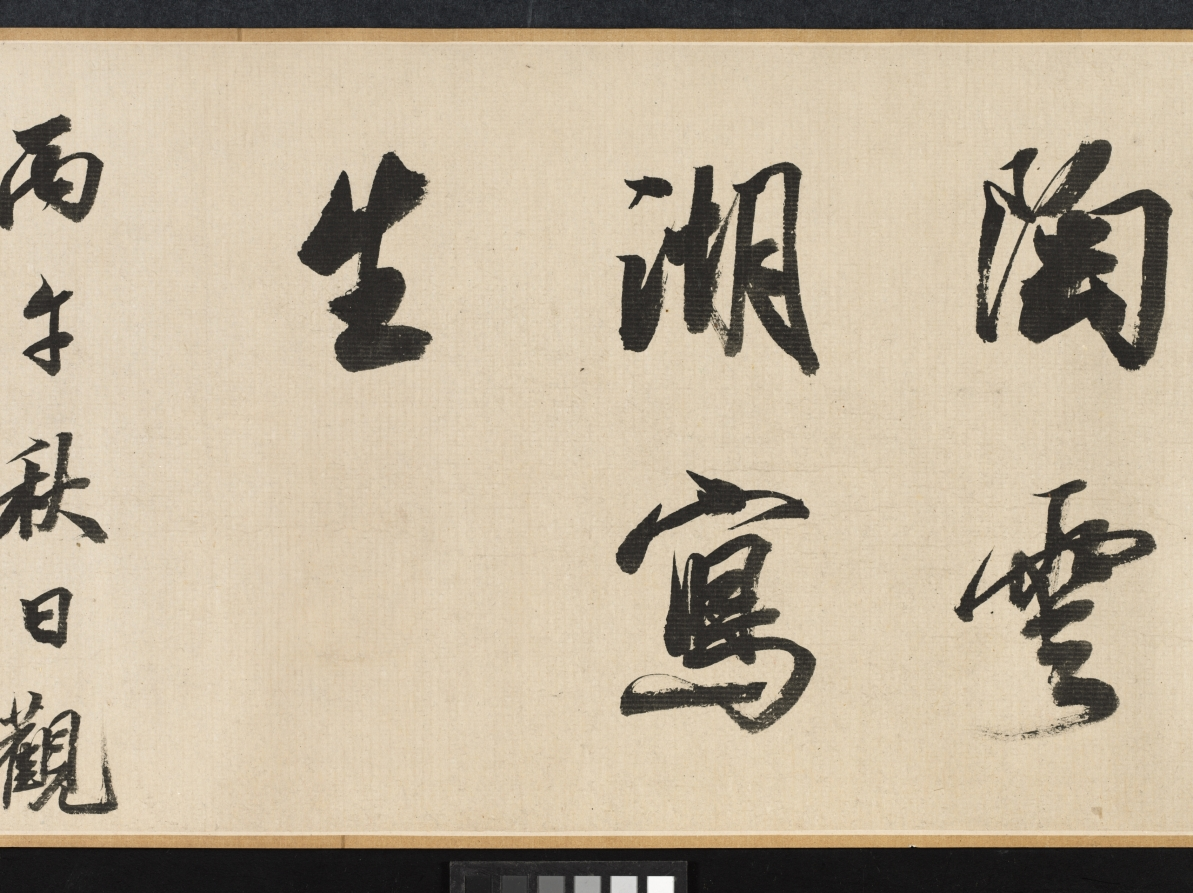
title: Chrysanthemums and Cabbage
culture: China, Ming dynasty (1368–1644)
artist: Tao Cheng (Chinese, active c. 1471–after 1502)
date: c. 1486 or before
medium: handscroll, ink and slight color on paper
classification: Painting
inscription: Artist's seal at beginning of painting: Yun hu 雲湖. Title by Wang Wenzhi 王文治 (1730–1802), date 1756. 2 seals of Wang Wenzhi 王文治 (1730-1802); 3 seals of Ku Yün (n. d.)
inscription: Section A (Chrysanthemums): 1 poem and 1 seal of Zhang Yuanzhen 張元禎 (1437–1507) - Jinshi, 1461; 1 poems and 3 seals of Ni Yue 倪岳 (1444–1501) - Jinshi, 1464; 1 poems and 2 seals of Zhao Xiang 趙祥 (life dates unknown) - Jinshi, 1469; 1 poems and 1 seals of Wu Xixian 吳希賢 (1437–1489) - Jinshi, 1464; 1 poems and 1 seals of Lü Chang 呂㦂 (1449–1511) - Juren, 1471; 1 poems and 3 seals of Fu Han 傅瀚 (1435–1502) - Jinshi, 1464; 1 poems and 1 seals of Feng Jue 馮珏 (life dates unknown) - Jinshi, 1478.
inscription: Chrysanthemums section, poem 1, by Zhang Yuanzhen 張元禎 (1437–1507): Several bushes of chrysanthemums grow in front of the Five-Willow Cottage,/ The yellow ones are really yellow and the white ones white./ This affable and decent fellow, young in years and unsophisticated,/ Has snapped one of the branches to dip in ink. (The Five-Willows Cottage was the home of the poet Tao Qian 陶潛 (Tao Yuanming 陶淵明, AD 365-427).) Chrysanthemums section, poem 2, by Ni Yue 倪岳 (1444–1501): Where at the Eastern Fence can you grieve for the Soul of the Xiang River?/ A man of upright character is mourned within the traces of ink./ White jade with a slight flaw would be a grievance forever,/ Later men should understand why even the roots of the flowers are washed. (Eastern Fence refers again to the poet Tao Qian 陶潛, while the Soul of the Hsiang River refers to the poet Qu Yuan 屈原 (c. 340–278 BC).) Chrysanthemums section, poem 3, by Zhao Xiang 趙祥 (life dates unknown): A clump of chrysanthemum grows in front of the bamboo pavilion,/ The winds of many autumns have blown since we parted beyond the river./ Straining wine through the official's cap of Tao [Qian] to prolong autumn's pleasures,/ The mists and clouds of ten thousand miles belong to the intoxicated. Chrysanthemums section, poem 4, by Wu Xixian 吳希賢 (1437–1489): It is a different spring if mulberry is planted during the latter part of the year,/ The dust of the world originally did not drop on clothing./ Who spills out ink under the Eastern Fence/ And paints so freely this portrait of chrysanthemums for the venerable Sir Tao? Chrysanthemums section, poem 5, by Lü Chang 呂㦂 (1449–1511): This full tray of ink for painting [flowers] at the Eastern Fence;/ Their whiteness or yellowness is not essential in capturing their beauty./ I don't have to go to Jiangnan to see them myself./ At my old house grow two or three branches. Chrysanthemums section, poem 6, by Fu Han 傅瀚 (1435–1502): Who daubed autumn flowers with ink/ As if they were dark dew on a branch tip only vaguely seen at evening?/ After the lazy clouds disperse, no one paints;/ A certain unconventionality pervades this painting. Chrysanthemums section, poem 7, by Feng Jue 馮珏 (life dates unknown): To satisfy his hunger, [the chrysanthemums] have at times entered the poetry of Qu Yuan;/ Taking up the wine cup, it felt close to Tao Qian./ [With them I am like] a lonely root sustained by deep water/ Or an old man to whose hair the color of youth returns.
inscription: Section B (Cabbage): 1 poem and 1 seal of Cai Qi 蔡圻 (life dates unknown) - degree information not known; 1 poems and 3 seals of Ni Yue 倪岳 (1444–1501) - Jinshi, 1464; 1 poem and 3 seals of Jiao Fang 焦芳 (1436–1517) - Jinshi, 1464; 1 poem and 3 seals of Li Dongyang 李東陽 (1447–1516) - Jinshi, 1464; 1 poems and 1 seals of Wu Xixian, signed “Xixian” 吳希賢 - Jinshi, 1464; 1 poems and 3 seals of Fu Han 傅瀚 (1435–1502) - Jinshi, 1464; 1 poems and 1 seals of Lü Chang 呂㦂 (1449–1511) - Juren, 1471; 1 poems and 2 seals of Zhao Xiang 趙祥 (life dates unknown) - Jinshi, 1469; 1 poems and 1 seals of Feng Jue 馮珏 (life dates unknown) - Jinshi, 1478.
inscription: Cabbage section, poem 1, by Cai Qi 蔡圻 (life dates unknown): The ink splashes are fresh from a frosty brush dipped in pond water;/ I can visualize that time when Yunhu 雲湖 [Tao Cheng] first showed his talents./ I lament the places where I scribbled before,/ Who would open them to inscribe a poem? (The first line is an allusion to the famous Jin dynasty calligrapher Wang Xizhi 王羲之 (AD 303-361), who practiced calligraphy so diligently at the edge of a pond that the water turned black with ink.) Cabbage section, poem 2, by Ni Yue 倪岳 (1444–1501): After rain the vegetables begin to grow;/ How are the colors of the masses lately!/ Once you get used to them, the tastiest parts are the ends of the roots;/ I don't know if they can be used for "seasoning soup." ("Seasoning soup" is an allusion to the statesmanship of a chief minister.) Cabbage section, poem 3, by Jiao Fang 焦芳 (1436–1517): This crop of purple stalks and green leaves is late and irregular;/ Now the rainy season is over for the Eastern Garden./ All the nobles nowadays dine on meat;/ Who of them knows the flavor of this [cabbage]. Cabbage section, poem 4, by Li Dongyang 李東陽 (1447–1516): It's always helped the honest man to sober up after drinks./ I intend to go to the deepest part of the stream-crossed garden/ To refresh myself in the fragrance and dew of evening. Cabbage section, poem 5, by Wu Xixian 吳希賢 (1437–1489): After rain, the white silk is filled with fragrant vegetables;/ How many times this happens in Mr. Tao's paintings./ On whom will you depend to present a memorial to the ruler?/ Don't let this color emerge on the faces of the people. (The last line is meant as a warning to officials: the color of the vegetables (green) may be pleasing in itself, but when it emerges on the faces of the starving poor, it signifies a badly governed world.) Cabbage section, poem 6, by Fu Han 傅瀚 (1435–1502): For twenty years I have feasted on the excellent mutton of an official;/ Yet I talk and dream about the garden and its vegetables./ Do not merely say it is good to chew the root of the cabbage--/ You must taste to understand what poverty is. Cabbage section, poem 7, by Lu Chang 呂㦂 (1449–1511): The capital is never a place for an apprentice in the "garden of scholarship."/ Who would write about gardens and vegetables on an examination paper?/ I've walked throughout the country in spring;/ Make sure the people don't show this color. Cabbage section, poem 8, by Zhao Xiang 趙祥 (life dates unknown): After a wash of rain, the spring garden is still in order;/ The flavor [of the cabbage] is more suitable with a small drink and the hum of a tune./ The rich and powerful in their mansions consume dish after dish of meat;/ Vegetarian food is known only by the scholars. Cabbage section, poem 9, by Feng Jue 馮珏 (life dates unknown): A new cabbage is nourished with dew;/ It takes a long time to grow and mature./ The business of "seasoning the soup" is your responsibility;/ Better command the gardener to take care [of the cabbages]. trans. HK/LYSL/WKH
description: On an autumn day in Beijing, Tao Cheng had a gathering with a group of scholar-officials and created two paintings in a spontaneous, casual style. The first depicts chrysanthemums, slender bamboo stalks, and a rock in monochrome ink. Tao applied light colors for the second painting that depicts cabbage. Tao deliberately placed the images on the first sections of the paper so that his honorable guests could add their poetic inscriptions inspired by his imagery. In the first section to the right, all seven poetic inscriptions refer to the beloved poet and recluse Tao Qian (also called Tao Yuanming, AD 365–427) who was particularly known for his profound love for chrysanthemum flowers. Most of the inscriptions in the second section express sympathy for the poor, since cabbage is the main ingredient in their humble food. Taken together, the poems and paintings allude to the life and responsibilities of the scholar-official: the importance of both an upright character and a concern for the poor citizens in order to achieve good government.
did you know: Eminent calligrapher Wang Wenzhi 王文治 was only 27 sui when he wrote the title in 1756.